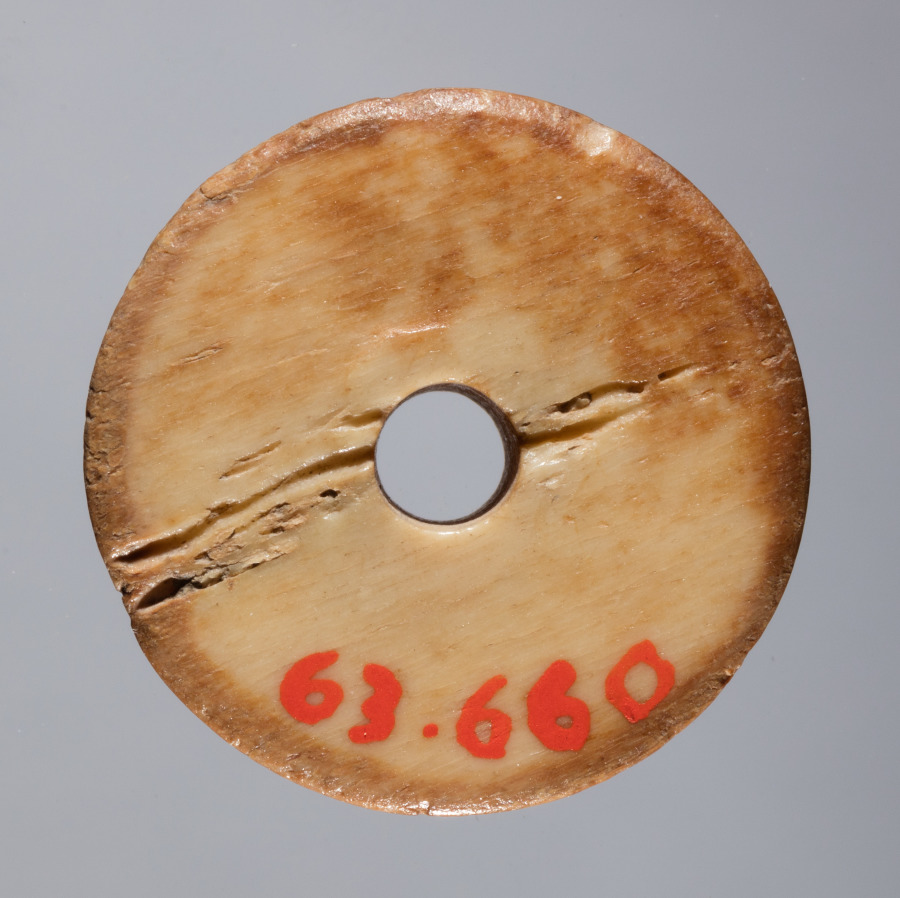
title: Spindle Whorl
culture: Iran, early Islamic period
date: 700s - 900s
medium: bone, incised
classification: Spindle Whorl